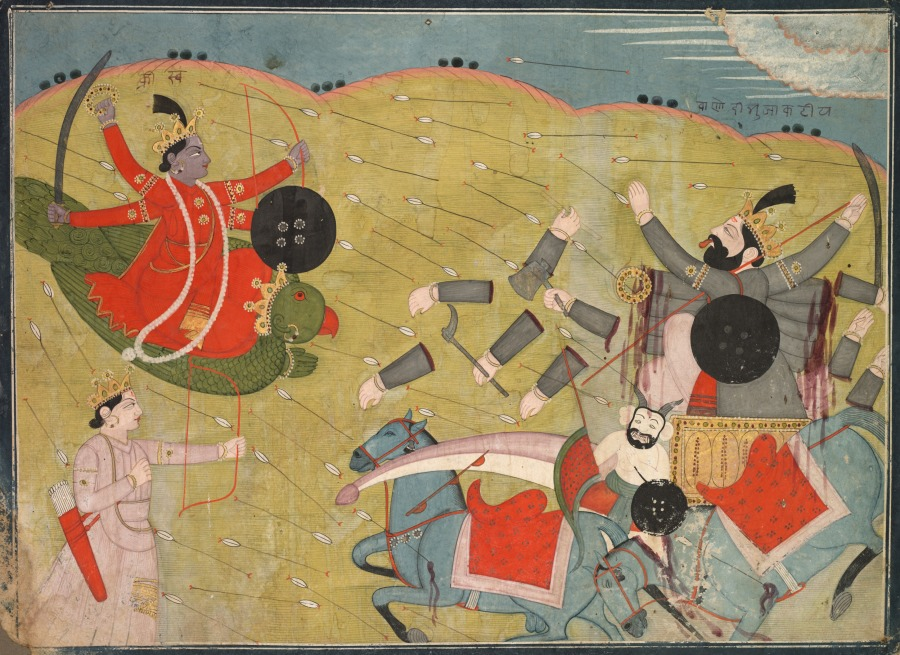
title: Krishna vanquishing King Bana, from an Usha-Aniruddha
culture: Northern India, Pahari kingdoms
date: c. 1840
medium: Gum tempera, ink, and gold on paper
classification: Painting